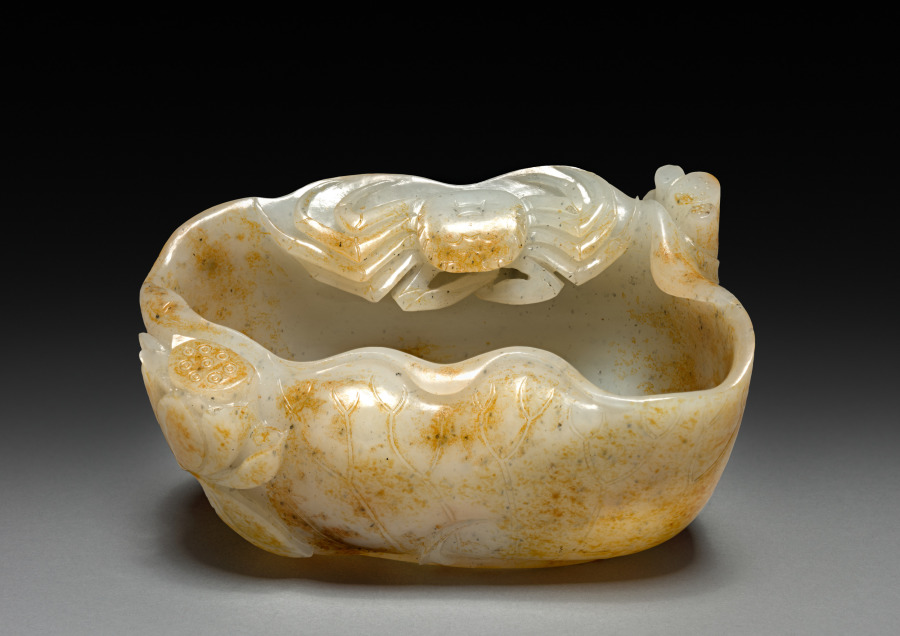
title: Cup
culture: China, Qing dynasty (1644-1911), Kangxi reign (1662-1722)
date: 1662–1722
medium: jade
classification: Jade